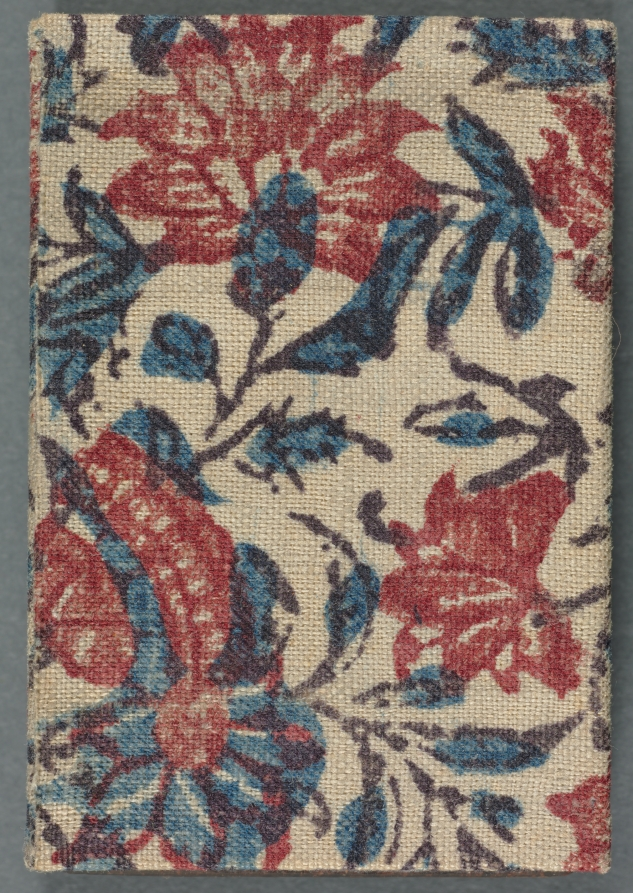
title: Miniature Album with Figures and Landscape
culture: China, Qing dynasty (1644–1911), Qianlong reign (1736–95)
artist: Zeng Yandong (Chinese, c. 1751–1827)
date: 1822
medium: Album of twelve leaves, ink and color on paper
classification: Painting